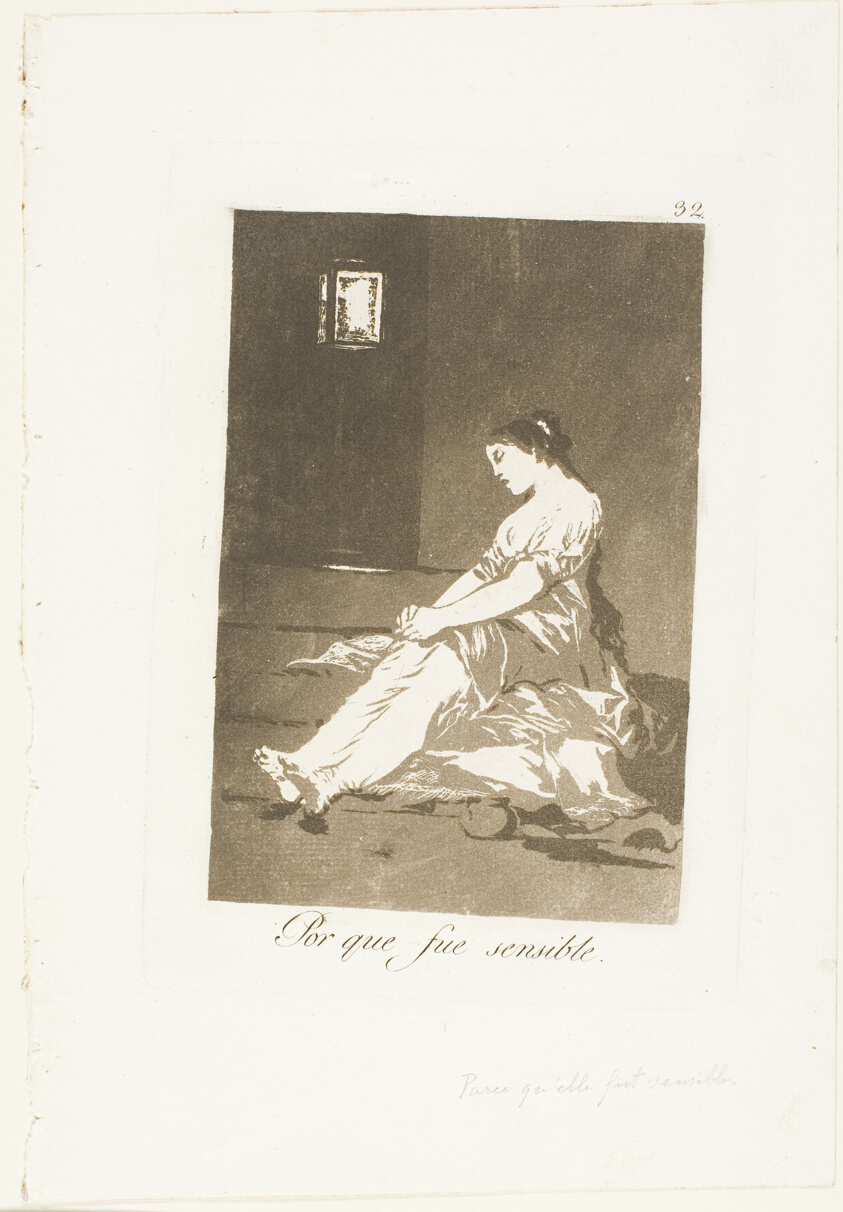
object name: Print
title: Because She Was Susceptible, plate 32 from Los Caprichos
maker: Francisco José de Goya y Lucientes (Spanish, 1746-1828)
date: 1797/99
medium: Aquatint on ivory laid paper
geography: Spain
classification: etching; print; prints and drawing